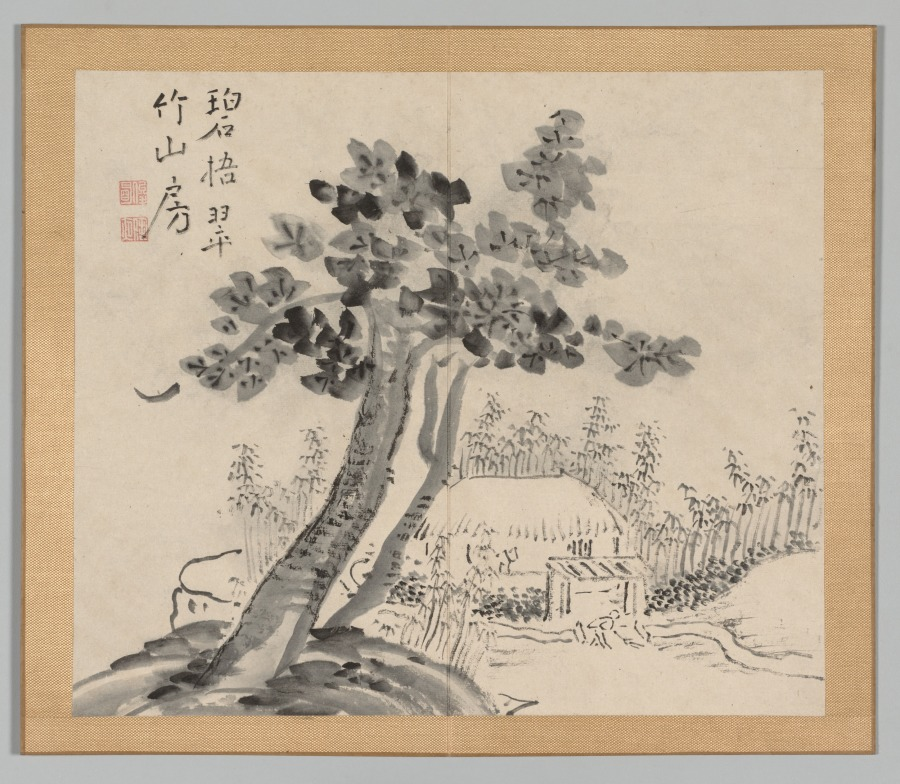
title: Reverberations of Taiga, Volume 2 (leaf 32)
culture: Japan, Edo period (1615–1868)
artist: Aoki Shukuya (Japanese, d. 1802)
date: mid- to late 1700s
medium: double-leaf from a pair of albums; ink and light color on paper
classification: Portfolio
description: Traditionally, young painters in Japan began their studies with an established master-painter. The master's compositions invariably became models that the apprentice copied to learn various ink and brush techniques. Shukuya was a pupil of the famous Kyoto artist Ikeno Taiga, whose style is reflected in these sketches of rocks, trees, and mountains.